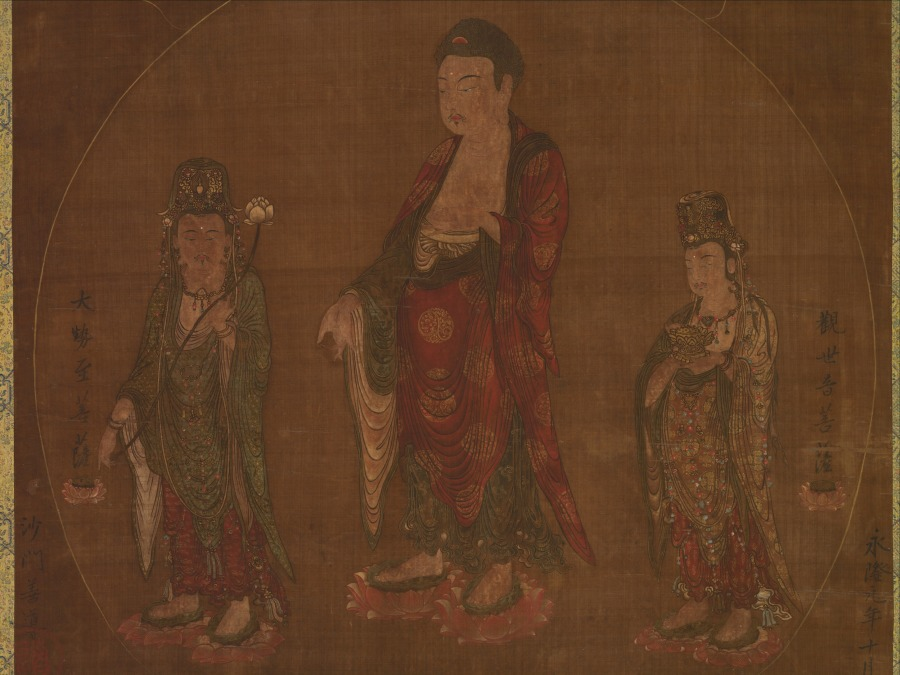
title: Buddha Amitābha with Two Attending Bodhisattvas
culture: China, Southern Song dynasty (1127-1279)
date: 1200s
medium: Hanging scroll; ink and color on silk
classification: Painting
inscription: 南無阿彌陀佛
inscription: 沙門善導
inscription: 觀世音菩薩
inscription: 大勢至菩薩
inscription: 永隆元年十月十五日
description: The supreme deities that rule over the Western Paradise—Amitābha (阿彌陀 in Chinese), Avalokiteśvara (Guanyin 觀音), and Mahāsthāmaprāpta (Dashizhi 大勢至)—are here enclosed within a circle of light. To secure entry into that paradise for Buddhist followers of the Pure Land sect, one must recite the phrase namo amituofo (南無阿彌陀佛, Homage to the Buddha Amitābha). Here the phrase is repeated 10 times in calligraphy above the figures, reinforcing the need for continual recitation.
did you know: Each line of calligraphy, which invokes the Buddha's name, emerges from a lotus blossom.